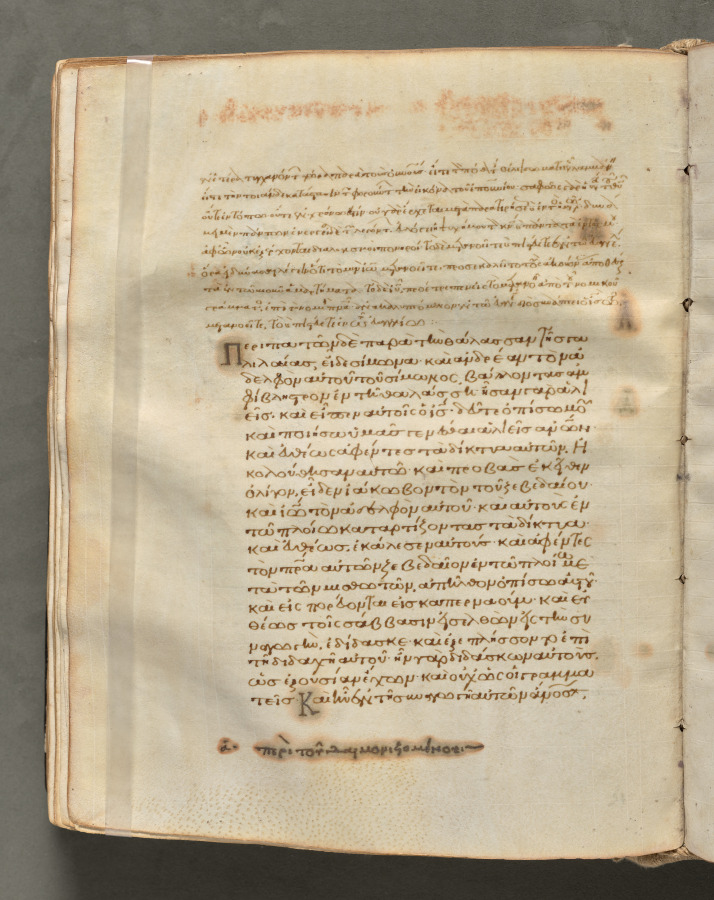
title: Text, folio 134 (verso), from a Gospel Book with Commentaries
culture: Byzantium, Constantinople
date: c. 1000–1100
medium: ink, tempera, and gold on vellum; leather binding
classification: Bound Volume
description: Each of the four gospels in this book opens on a page with brilliantly illuminated borders depicting the author of the text as well as birds-principally peacocks, symbols of the immortality of the soul-and fountains, representing the fountain of life and the salvation of the soul. This volume consists of 428 leaves with texts in Greek. Its level of sophistication suggests that it was probably written and decorated in a monastery in Constantinople.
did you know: Gospel Books were carried in procession through Byzantine churches.